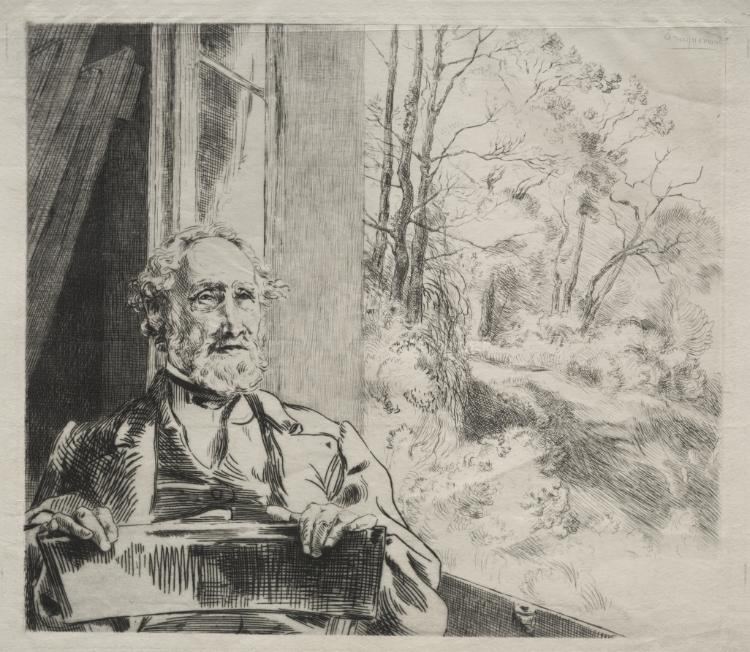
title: Meyer-Heine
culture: France, 19th century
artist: Félix Bracquemond (French, 1833–1914)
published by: Alfred Cadart (French, 1825–1875)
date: c. 1872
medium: etching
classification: Print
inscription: signed, upper right, in plate: Bracquemond